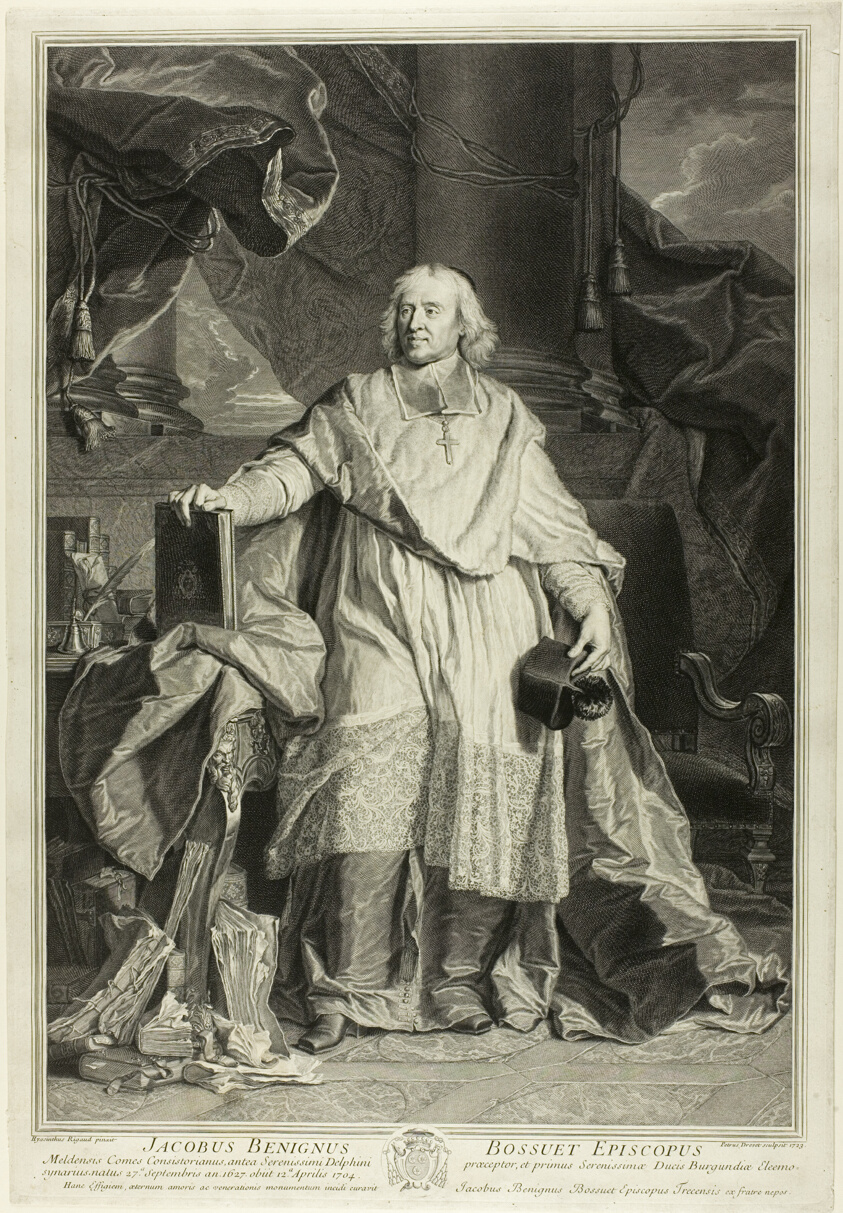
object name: Print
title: Portrait of Jacques Bénigne Bossuet, Bishop of Meaux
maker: Pierre-Imbert Drevet (French, 1697-1739); after Hyacinthe Rigaud (French, 1659-1743)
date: 1723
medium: Engraving on ivory laid paper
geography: France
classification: engraving; print; prints and drawing